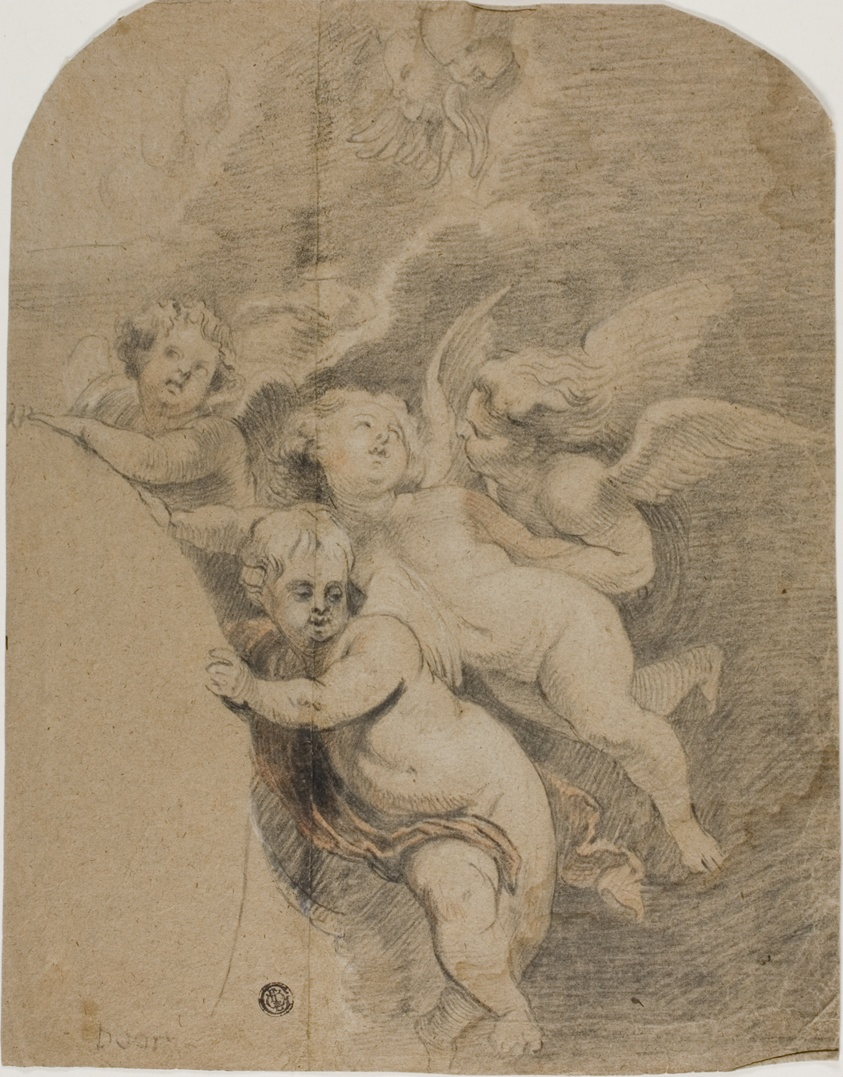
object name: Drawing and Watercolor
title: Cherubs and Putti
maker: Possibly Peter Paul Rubens; Flemish, 1577-1640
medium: Black chalk, with black crayon and red chalk, heightened with traces of white chalk, on pale brown laid paper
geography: Flanders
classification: chalk; drawings (visual works); prints and drawing